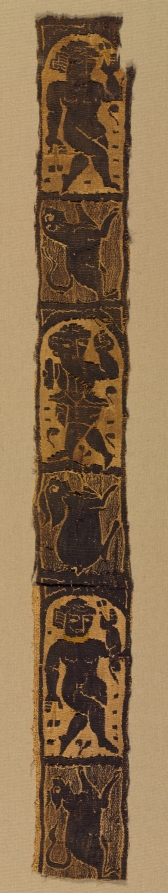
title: Ornamental Shoulder Bands from a Tunic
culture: Egypt, Byzantine period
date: 500s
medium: Undyed linen and dyed wool: tapestry weave with supplementary weft wrapping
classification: Textile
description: The orientation of the figures indicates that these were vertical bands on a tunic descending from the shoulders. Human figures under arches alternate with dogs, rabbits, and a lion. The right band displays a nude female dancer playing finger cymbals at the top and bottom, and in the center, a hunter dressed in a short garment (chiton) draped over one shoulder carries a shield in his right hand and a rock in his raised hand. The left band displays, from top to bottom, a nude male carrying a leafy branch; a shepherd carrying a shepherd’s crook and dressed in a skirt of animal skin; and a nude female dancer with a scarf loosely draped behind her.